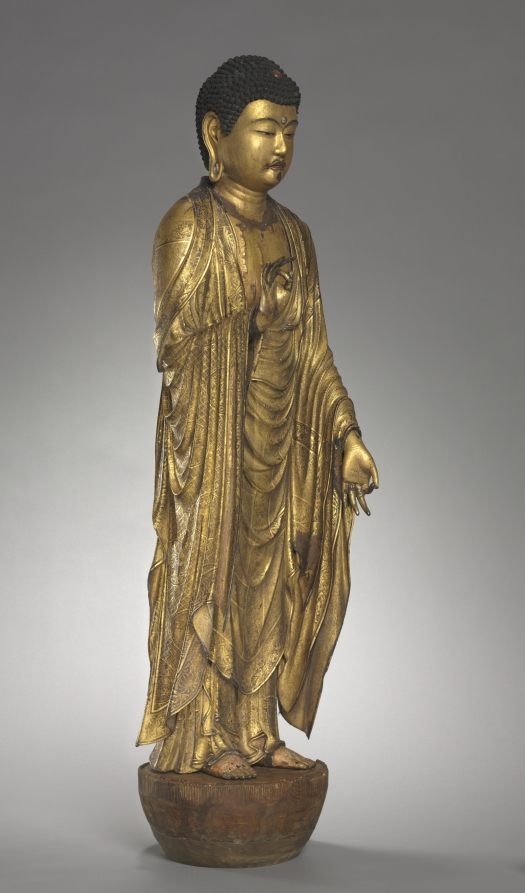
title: Buddha of Infinite Life and Light (Amida Nyorai)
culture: Japan, Kamakura period (1185–1333)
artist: Kōshun (Japanese, active mid-1200s)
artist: assisted by Koshin (Japanese, active mid-1200s)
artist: assisted by Joshun (Japanese, active mid-1200s)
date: 1269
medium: Cypress with lacquer, color, gold, cut gold, rock-crystal inlaid eyes, and quartz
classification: Sculpture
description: This ornate Buddha Amida stands in a posture of welcome, greeting the dying who will accompany him back to his Pure Land. Documents inserted into the sculpture’s hollow core around the time of its creation include a copy of the sacred text Amida Sutra, a register of donors who desired to be joined together in generating karmic merit (kechien) through the creation and dedication of the sculpture, and a record asserting that the image was completed over the course of 33 days in 1269 at Shitennōji Temple in Osaka.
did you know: The lead sculptor was Kōshun, who had been granted the lofty title “Bridge of the Law.”